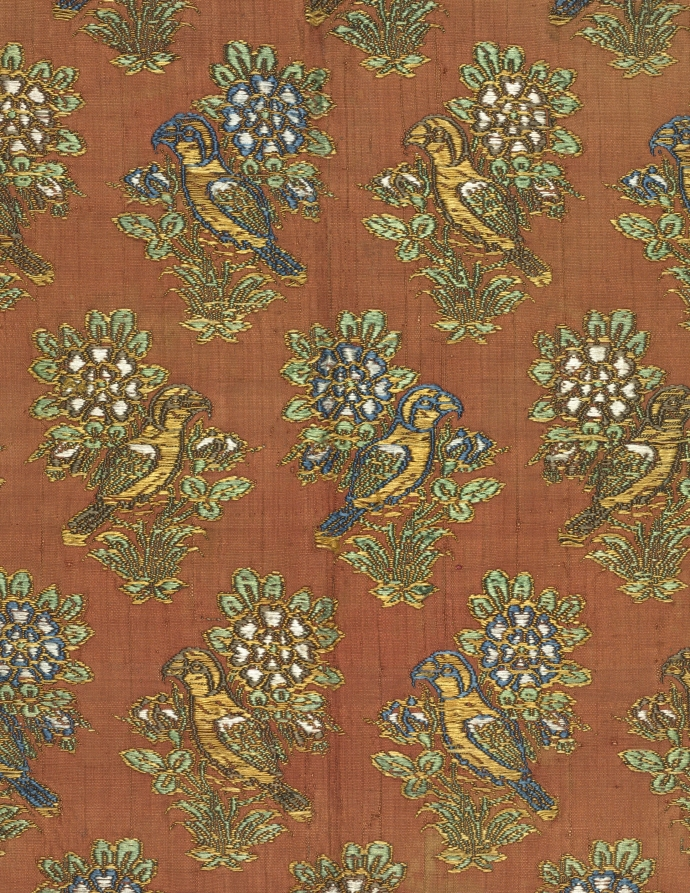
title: Fragment of Silk Taffeta with “Rose and Nightingale” Motif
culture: Iran, Safavid period (1501–1722)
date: 1700s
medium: Silk and metallic thread: taffeta, brocaded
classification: Textile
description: A luxurious textile like this would have been used for courtly robes or coats in Safavid Iran. The bird-and-flower motif is known as gul-u-bulbul in Persian, meaning “rose and nightingale.” The motif references the poetic image of a nightingale plaintively singing to an indifferent rose as a metaphor for unrequited human love as well as the soul’s desire for mystical union with the divine.